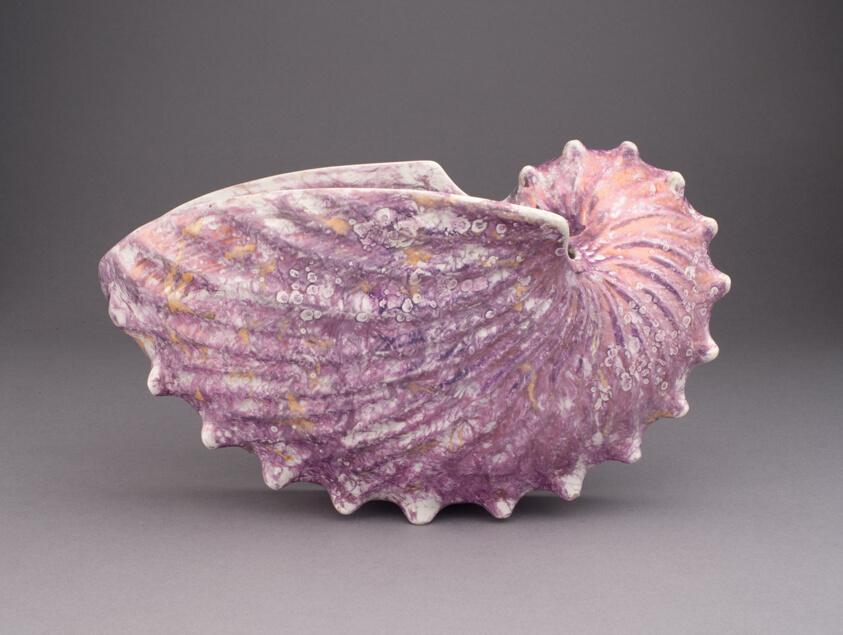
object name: Ceramics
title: Wall Pocket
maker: Wedgwood Manufactory (England, founded 1759)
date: c. 1805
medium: Earthenware with lustre decoration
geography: Staffordshire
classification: ceramics; european decorative arts; earthenware; lustreware (moonlight luster)